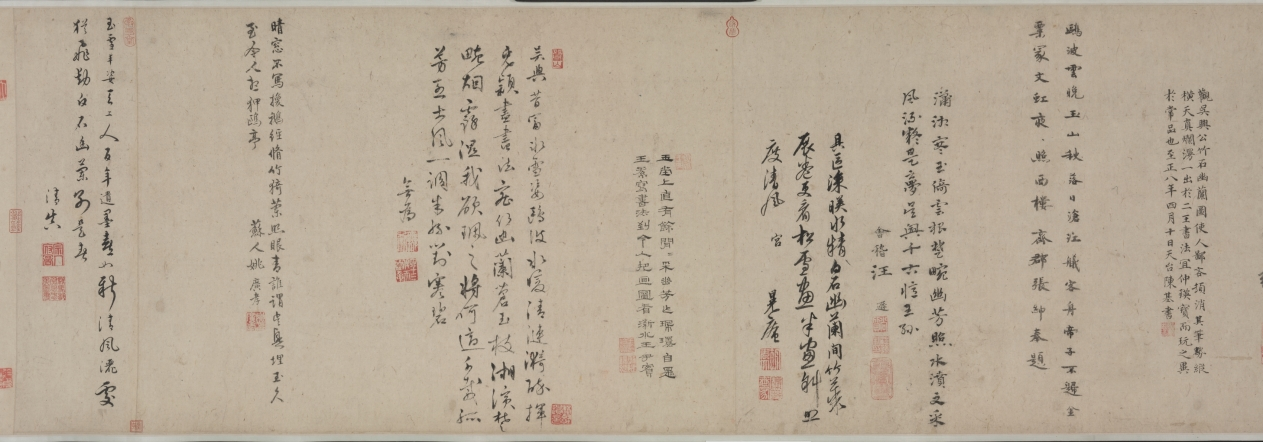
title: Bamboo, Rocks and Lonely Orchids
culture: China, Yuan dynasty (1271-1368)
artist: Zhao Mengfu (Chinese, 1254–1322)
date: 1271–1368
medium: Handscroll; ink on paper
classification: Painting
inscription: 竹石幽蘭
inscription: 孟頫為善夫寫. [印] 趙氏子昂; [印] 松雪齋; [印] 天水郡圖書印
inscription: 古人善書者必能畫點墨作蠅，便自有生意。松雪翁蘭石草聖飛帛筆法皆具，可寶也。安陽韓性 [印]明善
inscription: Colophon 2. Qiu Yuan 仇遠 (1247-after 1328), a respected poet during the Song and Yuan periods. He was linked to, among others, Zhao Mengfu and Gao Kegong. Zhao Mengfu painted a version of Nine Songs 九歌圖 for him, and Gao Kegong dedicated to him a painting titled Mountain Village 山村圖 (current whereabouts unknown). His poem here is also preserved in his collected works.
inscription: Colophon 3. Zheng Yuanyou 鄭元祐 (1292-1364), an erudite scholar and teacher of renown, active in Hangzhou and Suzhou. In the 1350s, when Gu Ying’s literary gatherings were at their peak, he was already elderly and participated in a limited way.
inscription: Colophon 4. Wu Kegong 吳克恭 (active mid-1300s), a friend of Gu Ying and Ni Zan 倪瓚 (1301–1374), a major Yuan painter.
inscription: Colophon 5. Angji 昻吉 (jinshi of 1348), of Western Xia 西夏 origin and a poet of distinction. He wrote an introduction to the painting Literary Gathering at Yushan 玉山雅集圖, of which Zhang Wo was the painter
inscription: Sheet 2. Yuan: friends of Gu Ying Colophon 6. Wang Zifang 王孜方 (active mid-1300s), an official who, at the time of his visits to Gu Ying’s estate, had reached the rank of Minister. He is better known under the name Wang Keju 王可矩.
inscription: Colophon 7. Ke Jiusi 柯九思 (1290–1343), a major official who served in the Kuizhang Pavilion 奎章閣 and as an advisor to Emperor Wenzong in matters of calligraphy and painting.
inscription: Colophon 8. Yu Li 于立 (active mid-1300s), a Daoist recluse, poet, and close friend of Gu Ying, so much so that during his visit to Gu Ying’s estate he was given accommodation in a special pavilion. His poem here is also preserved in Gu Ying’s Cao tang ya ji.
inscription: 至正十一年十月廿八日男奕百拜堇觀 [印] 趙奕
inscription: Colophon 10. Yu Ji 虞集 (1272-1398), a major official and literary figure who also served in the Kuizhang Ge. His poem is recorded in his collected works. The poem is one of a set of four inscribed at the request of Wang Huayu 汪華玉 on Orchids and Rock 蘭石圖 by Zhao Mengfu, obviously a different, long lost, painting. Wang Huayu was an official and a collector (jinshi of 1327). Yu Ji’s colophon here was written before 1348 and during his retirement in Linchuan 臨川, Jiangxi, possibly sent from there. It is possible he had not seen the painting, and his calligraphy here appears to be rather casual and detached, jotting down an old poem without much care, contrary to his earlier practice.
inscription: Colophon 11. Sun Shi 孫時 (mid-1300s–early 1400s), a native of Yuncheng 鄆城, Shandong, and a jinshi of 1390. He may have been quite young when paying a visit to the Yushan gatherings in the late 1340s and early 1350s.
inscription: Colophon 12. Zhang Zhu 張翥 (1287–1368), Qiu Yuan’s disciple and a poet of renown, who enjoyed a belated career in officialdom and was known for his integrity.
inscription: Sheet 4. Yuan and Ming: further friends of Gu Ying; colophon 17 begins the early Ming sequence. Colophon 13. Zhang Wo 張渥 (active c. 1336-after 1364), a frustrated scholar, a poet, and a painter of landscape and figures. An active participant in Gu Ying’s literary circle, he painted the Literary Gathering at Yushan, a pictorial document of the individuals and activities on Gu Ying’s estate. His rendering of Nine Songs is well known, and one version is in the collection of the Cleveland Museum of Art (see 1959.138). His poem here is also found in Gu Ying’s Cao tang ya ji, under the entry “ti Zhao Hanlin mo lan 題趙翰林墨蘭” (inscribed on the Ink Orchid by Zhao the Hanlin academician). This is a rare instance of calligraphy as well as signature by the artist.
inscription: 觀吳興公竹石幽蘭圖使人鄙吝頓消。其筆勢從橫天真爛澷，一出於二王書法。冝仲瑛寳而玩之異於常品也。至正八年十月天台陳基書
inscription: Colophon 15. Zhang Shen 張紳 (active about 1340–after 1385), a respected calligrapher and participant in Gu Ying’s literary gathering. He resided in Kunshan, the same city where Gu Ying’s estate lies. In the third line of the poem, he mentioned Gu Ying’s hao, “Jinsu 金粟.” This was a name he assumed later in life, after the death of his mother in the year 1356. Thus this inscription must have been written after that date.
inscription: Colophon 16. Wang Sun 汪遜 (active mid-14th century), a little-known native of Kuaiji 會稽, who may have been one of the infrequent visitors to Gu Ying’s estate.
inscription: Colophon 17. Hu Guang 胡廣 (1370-1418) is the first Ming colophon writer on this scroll. He was an official of great power in the court and a trusted advisor of Emperor Chengzu; he served as the Grand Academician of the Hall of Literary Profundity 文淵閣大學士 and Grand Academician of the Left Secretariat of the Heir-Apparent 左春坊大學士.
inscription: Sheet 5. Early Ming Colophon 18. Wang Yinshi 王尹實 (active about 1403–about 1424), a native of Siming 四明, Zhejiang, and a minor official and calligrapher.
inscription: Colophon 19. Zhang Yuchu (signed here as “Wuwei 無 為”), the forty-third Heavenly Master of the Zhengyi sect of Daoism. A man of erudition, he was also a poet, painter, and calligrapher. A modified version of the poem here was published in his collected works titled Xian quan ji 峴泉集. A slight modification in the first line is the only change: “Wu xing miao yao nian bing xue zi 吳興玅年氷雪姿.”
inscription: Colophon 20. Yao Guangxiao 姚廣孝 (1335-1418), a Buddhist monk, scholar, and counselor to Chengzu in his successful attempt at usurpation of the throne. Yao Guangxiao was a controversial figure but wielded enormous power.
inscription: Sheet 6. Wang Ning alone Colophon 21. Wang Ning 王寧 (d. 1411) signed as “Qingzhen 清真” in this colophon. One of the three seals reveals his identity as the Yongchun Hou 永春侯 [Marquis of Lasting Spring] (appointed 1402), and the husband of Princess Huaiqing 懷慶公主 (1328-1398), the sixth daughter of the founder of the Ming dynasty, Zhu Yuanzhang. This colophon postdates 1402.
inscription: Sheet 7. Mid-Ming Colophon 22. Ou Yi’an 區易安 (active first half of 15th century), unknown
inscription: Colophon 23. Chen Lian 陳璉 (1370-1454), a native of Dongguan 東莞, Guangdong 廣東, and an official admired for his erudition and perspicacity. In view to the known calligraphic style of Chen Lian, this colophon appears to be a transcription and not written by him.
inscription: Colophon 24. Wei Ji 魏驥 (1374-1471) enjoyed longevity (he lived to the age of ninety-eight) and an extended length of service as an official. A jinshi of 1406, he eventually became the Minister of Personnel in Nanjing 南京吏部尚書. The colophon here is dated 1434, when he was invited to view the painting by the Court Musician Mo Zhizhong 莫至翀, its owner. Again, in view of its calligraphic style, this was not written by him, but is a transcription from the original.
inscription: Colophon 25: Zhang Yi 章鎰 (active 1462-1473), a Ningbo native and an official with a reputation for courage and integrity.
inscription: Sheet 8. Further mid-Ming Colophon 26. Yin Zhi 尹直 (1427-1511), a controversial figure in Ming politics in spite of his erudition and high position as the Minister of War 兵部尚書.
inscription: Colophon 27. Zou Yu 鄒虞 (active 1460-1520; jinshi of 1490), a native of Hangzhou. In 1510, he was appointed Administrative Vice Commissioner in Guangdong.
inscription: Sheet 9. Xu Shouhe 徐守和 alone Colophon 28. Xu Shouhe 徐守和 dated his entry in 1629. Since he wrote it in his own studio, The Lesser Qingbi Pavilion 小清閟, he was likely the owner of the scroll. Xu’s life is not well documented; he was a connoisseur of note during the last years of the Ming dynasty rule. He may have acquired the Cleveland scroll from Wu Ting, whose seals appear here.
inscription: Sheet 10. The mounter’s note. Xu Shudong 徐曙東 of Jiaxing 嘉興 made the remounting on the first day of sixth month, 1802.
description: Bamboo and orchids are motifs associated with the virtues of the scholar-official. Bamboo that bends but does not break stands for moral integrity, endurance, and loyalty. Wild, fragrant orchids that bloom in the shadow symbolize modesty and the aura of learnedness. Rocks are often considered to be miniature versions of mountains that form the universe. This monochrome ink painting is brushed on paper in a masterfully calligraphic manner. While the rocks are delineated in chalky, dry strokes showing the effect of flying white (feibai), the bamboo and orchids are drawn with a swift brush demonstrating the virtuosity of the artist.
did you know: One of the many inscriptions records that the handscroll was last remounted by Xu Shudong 徐曙東 of Jiaxing 嘉興 in 1802.